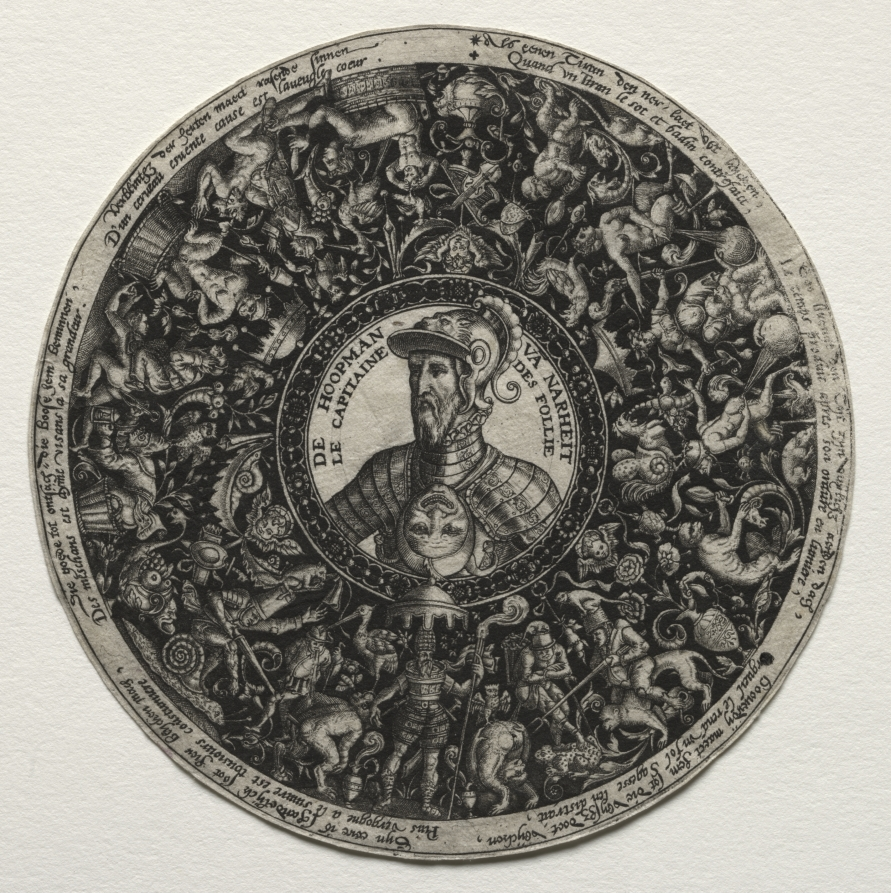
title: The Captain of Folly: Design for a Dish with Medallion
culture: Flanders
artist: Theodor de Bry (Flemish, 1528–1598)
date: c. 1577–78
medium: engraving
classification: Print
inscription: center, in plate: DE HOOPMAN VA NAHRHEIT / LE CAPITAINE DES FOLLIE